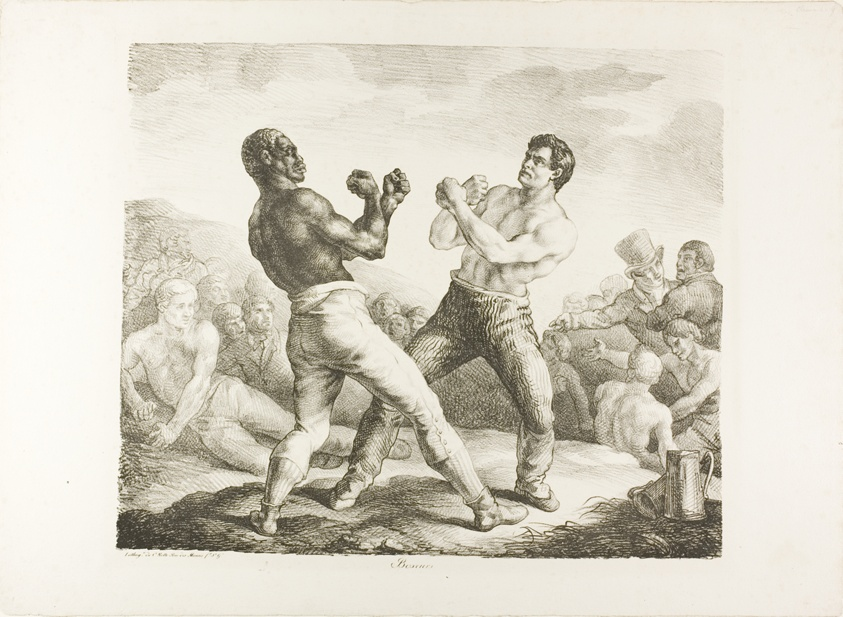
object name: Print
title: The Boxers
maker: Jean Louis André Théodore Géricault (French, 1791-1824); printed by Charles Étienne Pierre Motte (French, 1785-1836)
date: 1818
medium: Lithograph in black on off-white wove paper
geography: France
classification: lithograph; print; prints and drawing